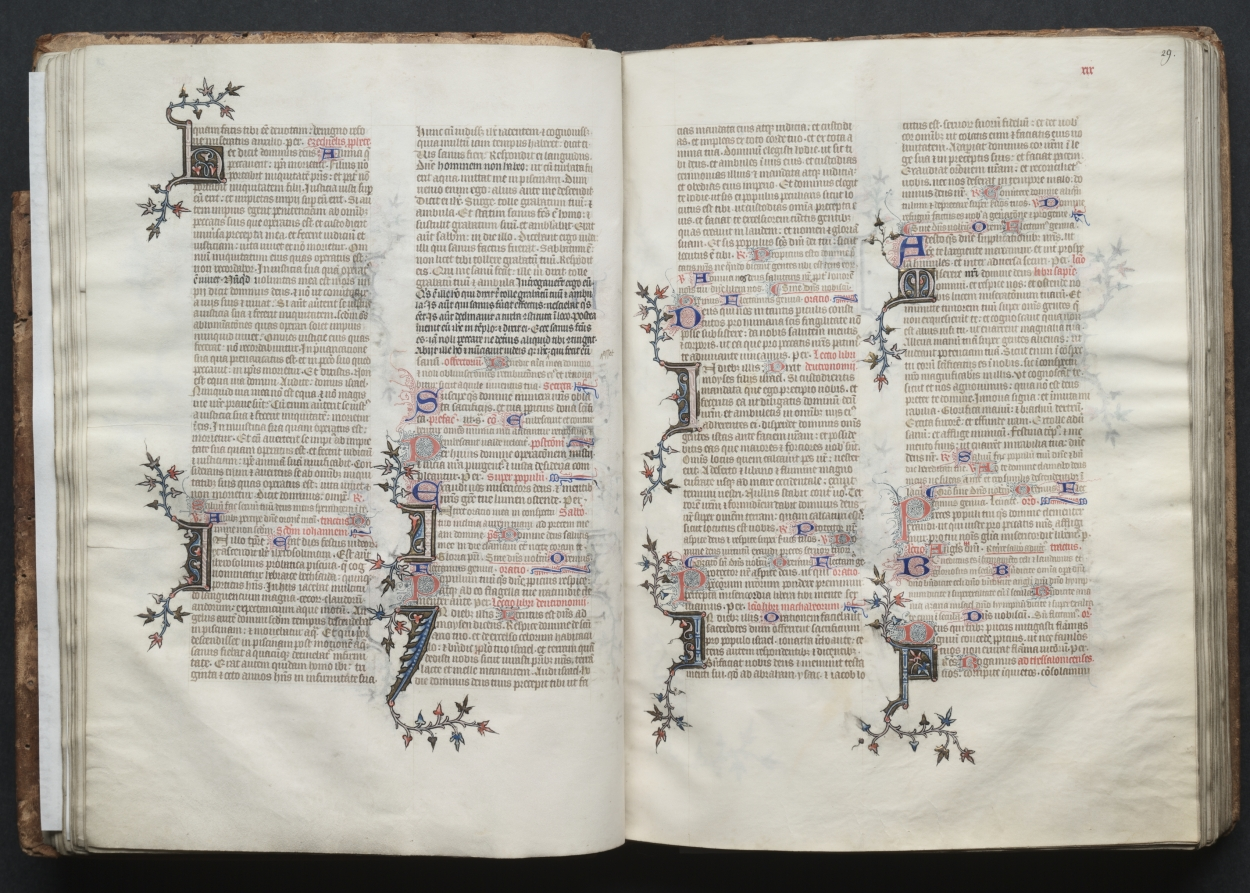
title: The Gotha Missal: Fol. 29r, Text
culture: France, Paris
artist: Master of the Boqueteaux (French)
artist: and Workshop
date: c. 1375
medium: ink, tempera, and gold on vellum; blind-tooled leather binding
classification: Bound Volume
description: The style and quality of this manuscript's decoration is typical of deluxe Parisian books made for aristocratic or royal patrons. Most of the book's decoration appears to be the work of the Master of the Boqueteaux, an artist active at the court of King Charles V (died 1380). His style was apparently shared by a number of book illuminators working in and around Paris. It is very possible that the Gotha Missal belonged to Charles V, but is not provable because the manuscript has no royal portraits and lacks a colophon. Given the book's magnificent decoration, however, it would seem that it was produced for a Valois prince, if not for the king himself. The manuscript receives its name from the German dukes of Gotha, its later owners.